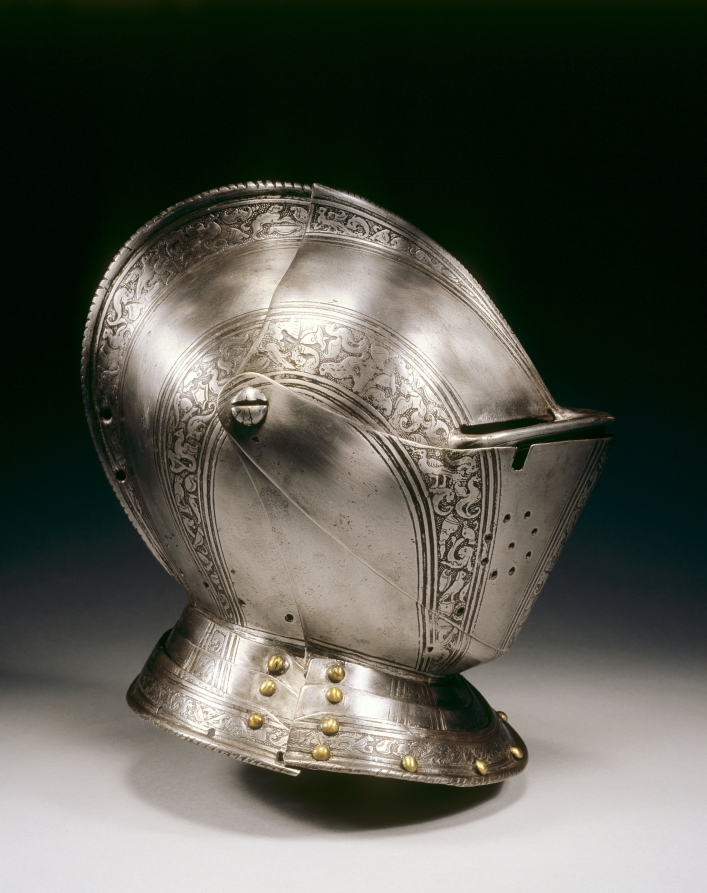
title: Close Helmet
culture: North Italy, Brescia (?), 16th century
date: c. 1575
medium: steel with etched decorative bands and roundels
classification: Arms and Armor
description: Decoration was critical to fine armor, and etching was the most commonly used technique. Here, the bands along the borders are etched. On the breastplate, pauldrons (shoulder guards), and tassets (hip and upper leg guards), etched medallions enclose profile busts reminiscent of ancient Roman portraits. The lance rest on the breastplate indicates that this half-suit was once part of a complete field armor for man and horse. The etching technique used for armor was developed in the late 1400s. The metal surface was first coated with an acid-resistant substance, such as wax or varnish. An etching needle was then used to scratch a design into the surface. The exposed areas were then treated with an acid that would "bite" or etch the lines into the metal. When the coating was removed, the etched design was blackened for contrast.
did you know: Etching, by far the most common technique for armor decoration, involved the use of a graving tool assisted by acid to create a design. The etched design could then be blackened to create contrast as shown here.